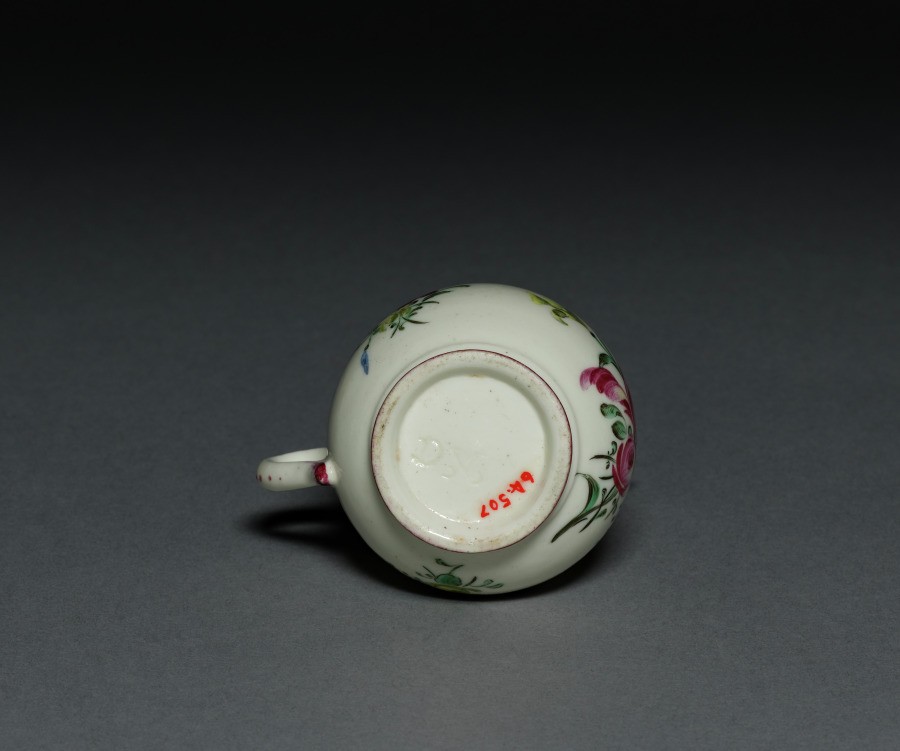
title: Custard Cup (pot à jus)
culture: France, Mennecy, 18th century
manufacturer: Mennecy- Villeroy Factory (French)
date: c. 1750–55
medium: soft-paste porcelain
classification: Ceramic